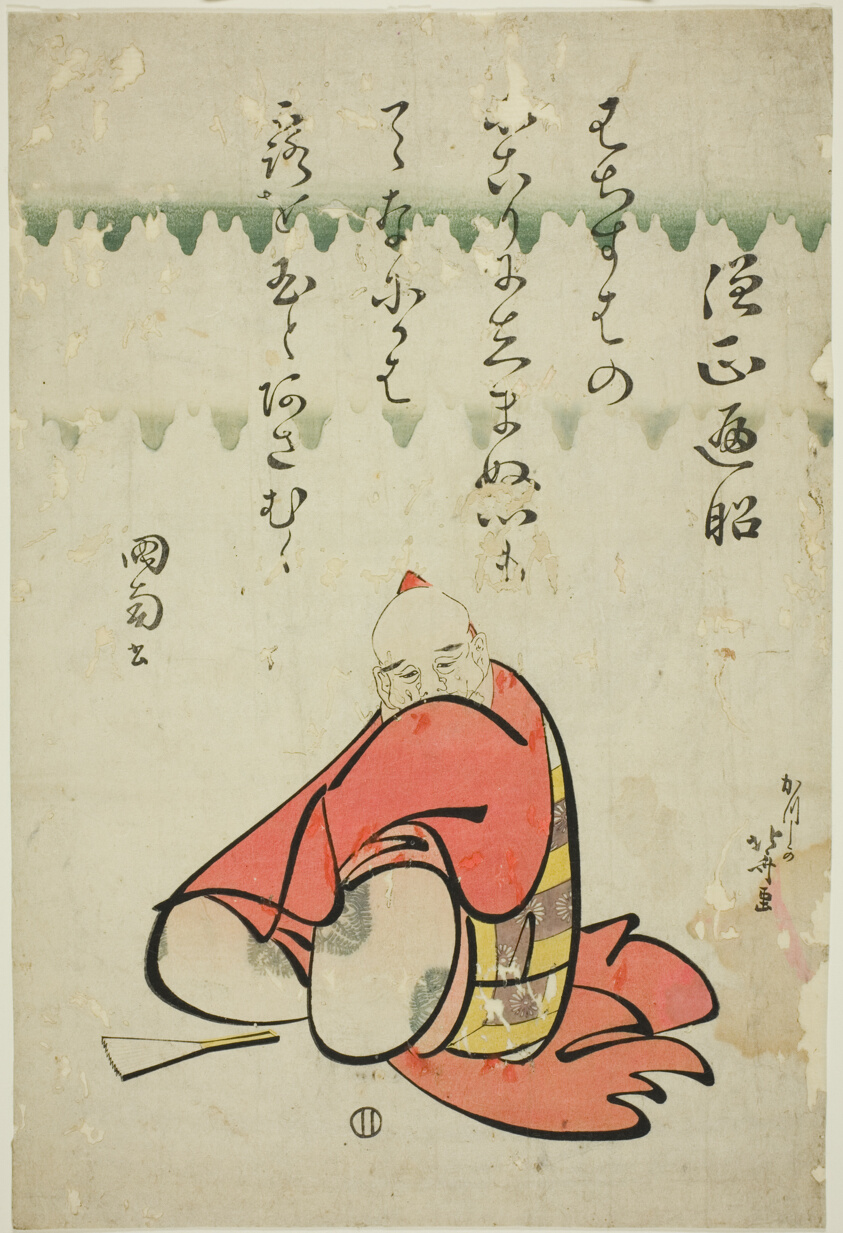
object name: Print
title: The Poet Sojo Henjo, from the series Six Immortal Poets (Rokkasen)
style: Japanese (culture or style)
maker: Katsushika Hokusai 葛飾 北斎; Japanese, 1760-1849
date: c. 1810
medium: Color woodblock print; oban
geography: Japan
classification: woodblock print; print; asian art